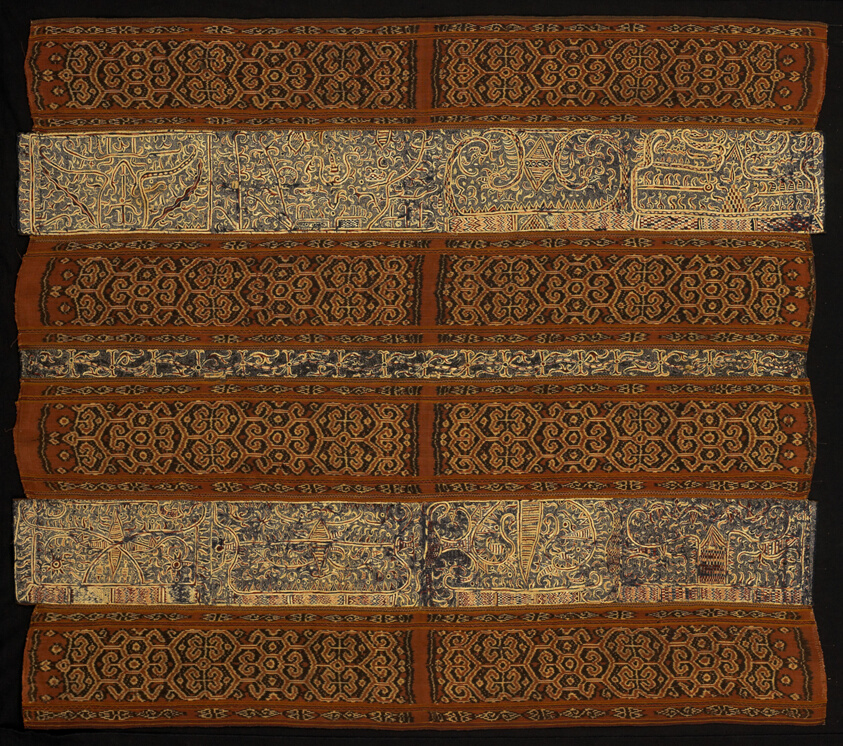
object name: Costume and Accessories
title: Woman's Ceremonial Skirt (tapis)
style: indonesian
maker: Paminggir people; Indonesia, South Sumatra, Lampung area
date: 18th century (?)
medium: Five panels joined: three panels of stripes of silk and cotton, warp resist dyed (warp ikat) plain weave (paired warps), stripes of warp-faced, weft ribbed plain weave with supplementary brocading wefts and one stripe of cotton, plain weave; embroidered with silk in back, double running, stem and surface satin stitches and two panels of cotton, plain weave; embroidered with silk in back, stem and surface satin stitches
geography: Indonesia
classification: textile; needlework (visual works); costume